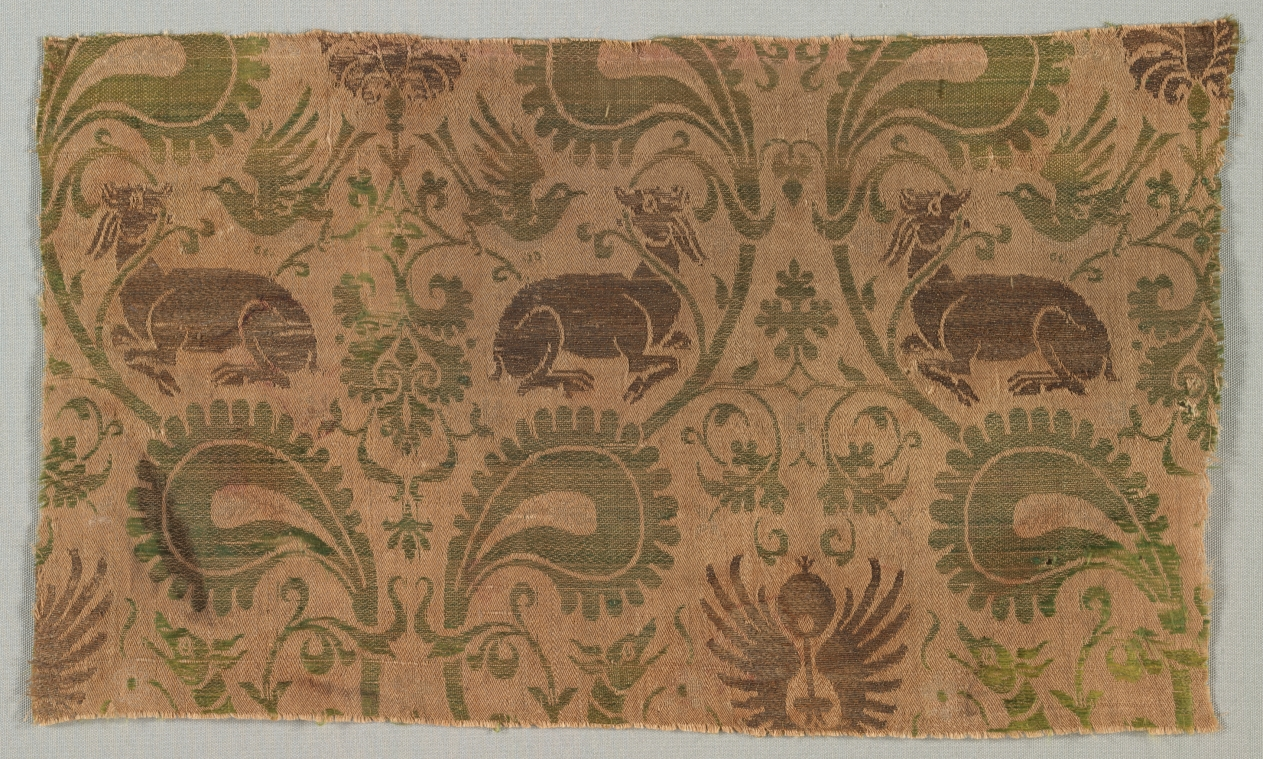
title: Silk with Dogs and Birds amid Vines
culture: Italy, second half of 14th century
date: 1350–1400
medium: silk, gold thread; a combination of two weaves, 2/1 twill and plain weave (lampas)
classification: Textile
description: Silks from China and the Islamic Near East introduced radically new designs with asymmetry and exotic animals around 1300, which Italian silk designers incorporated in an international style to compete with imports from the East. These large palmette leaves were adapted from Islamic silks whereas the recumbent deer, birds, and dogs (visible at the bottom) were popular Italian motifs. Textiles were lucrative commercial commodities during the Middle Ages. Intrepid Italian merchants traveled by land and sea to China, Mongolia, India, and the Islamic Near East, led by the maritime republics of Venice and Genoa. The renowned Venetian, Marco Polo, published his overland journey across Asia to China in 1265.